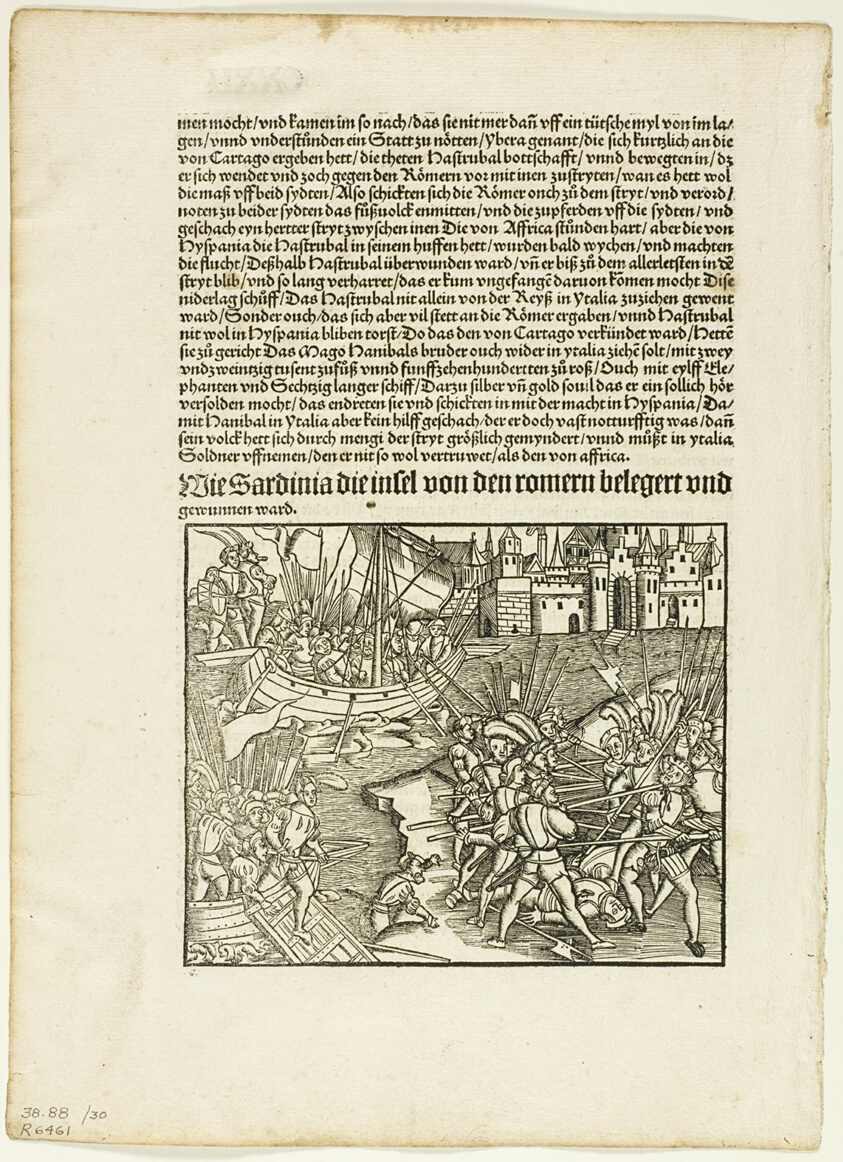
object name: Print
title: Illustration from Romische Historien by Titus Livius, plate 30 from Woodcuts from Books of the XVI Century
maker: Unknown Artist (German, 16th century); assembled by Max Geisberg (Swiss, 1875-1943)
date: 1505, assembled into portfolio 1937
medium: Woodcut on paper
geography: Germany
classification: woodcut; print; prints and drawing